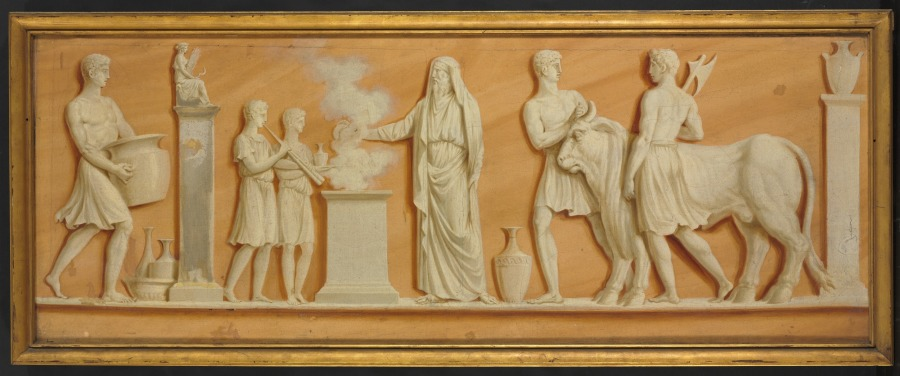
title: Overdoor Painting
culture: France, 18th century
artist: Pierre Rousseau (French, 1751–1829)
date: 1790s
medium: oil on canvas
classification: Painting